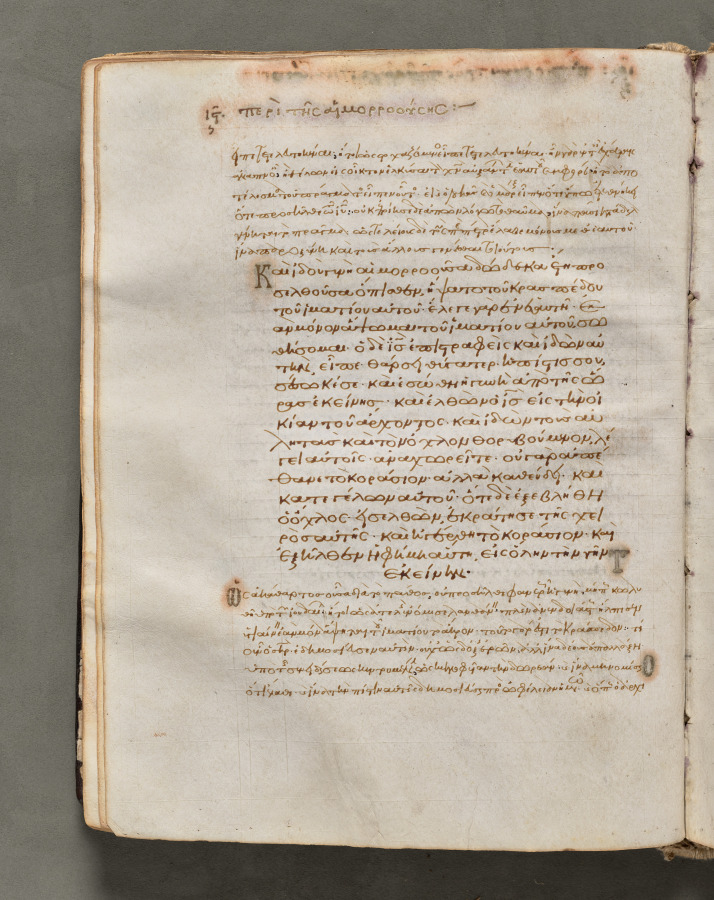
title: Text, folio 39 (verso), from a Gospel Book with Commentaries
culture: Byzantium, Constantinople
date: c. 1000–1100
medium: ink, tempera, and gold on vellum; leather binding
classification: Bound Volume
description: Each of the four gospels in this book opens on a page with brilliantly illuminated borders depicting the author of the text as well as birds-principally peacocks, symbols of the immortality of the soul-and fountains, representing the fountain of life and the salvation of the soul. This volume consists of 428 leaves with texts in Greek. Its level of sophistication suggests that it was probably written and decorated in a monastery in Constantinople.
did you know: Gospel Books were carried in procession through Byzantine churches.